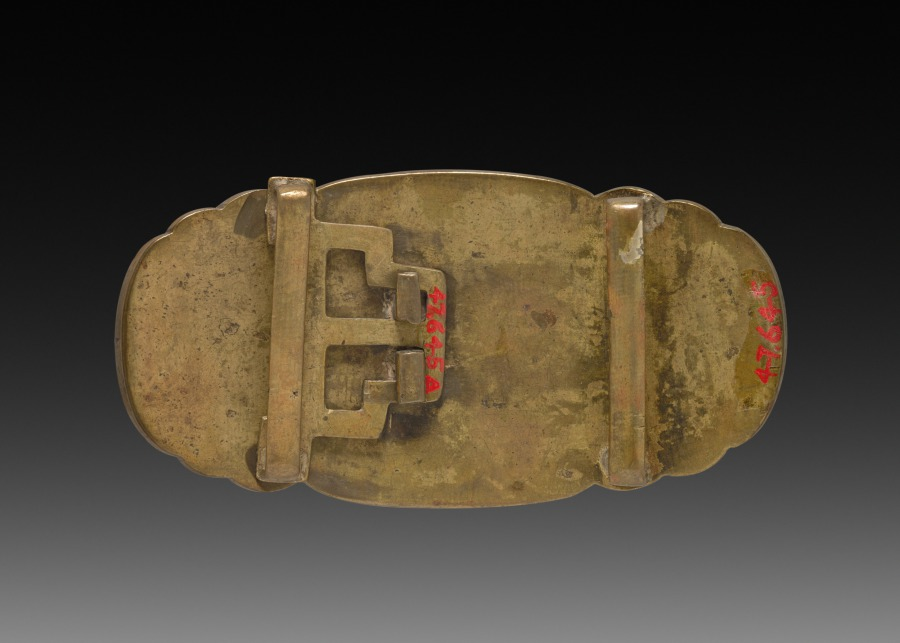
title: Buckle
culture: China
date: 1900s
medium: brass set with agate and jade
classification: Jewelry